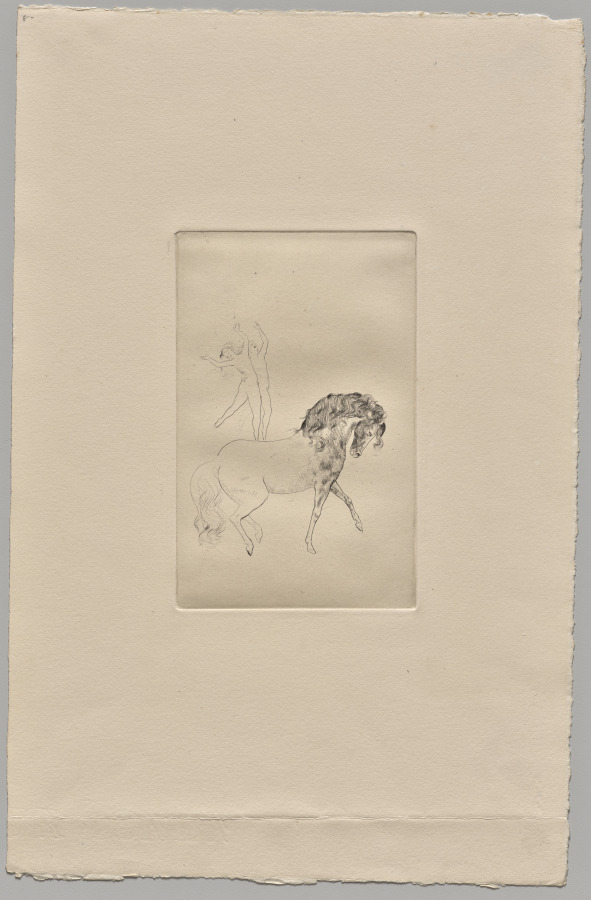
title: At the Circus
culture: Spain, 20th century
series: The Saltimbanques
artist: Pablo Picasso (Spanish, 1881–1973)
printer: Louis Fort (French, active 1800s–1900s)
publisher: Ambroise Vollard (French, 1867–1939)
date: winter 1905–6, printed 1913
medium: drypoint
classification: Print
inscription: Watermark: [VAN GELD]ER ZONEN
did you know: Picasso frequently attended the Cirque Medrano in the Montmartre neighborhood of Paris where he lived at the time.